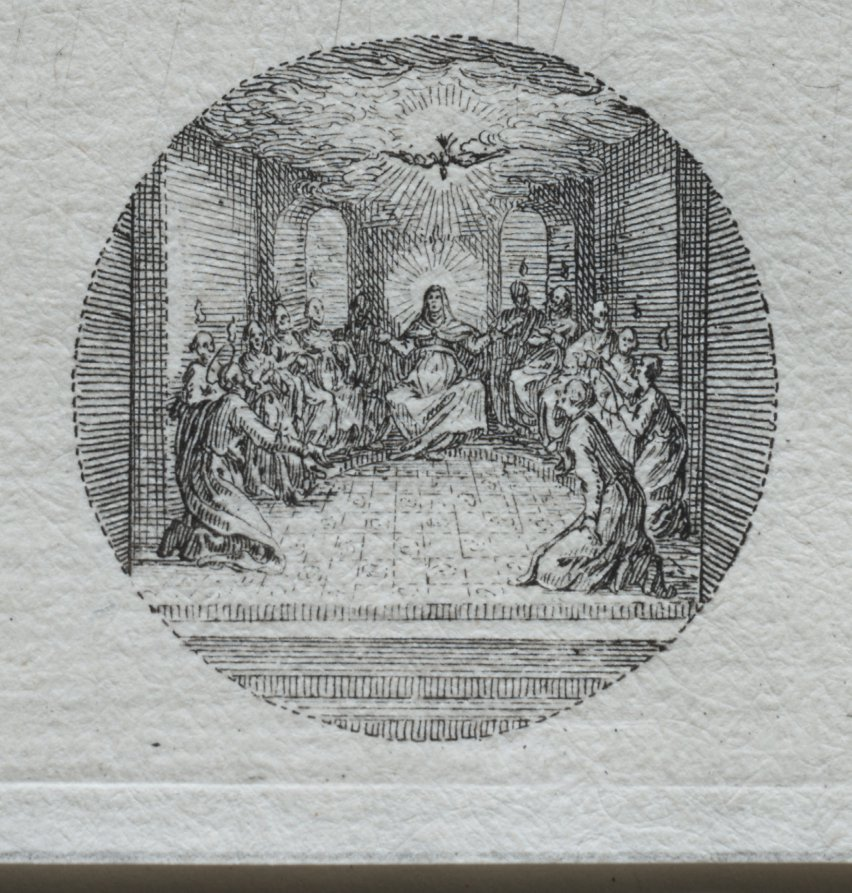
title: The Mysteries of the Passion: The Descent of the Holy Spirit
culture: France, 17th century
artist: Jacques Callot (French, 1592–1635)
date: 1631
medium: etching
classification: Print